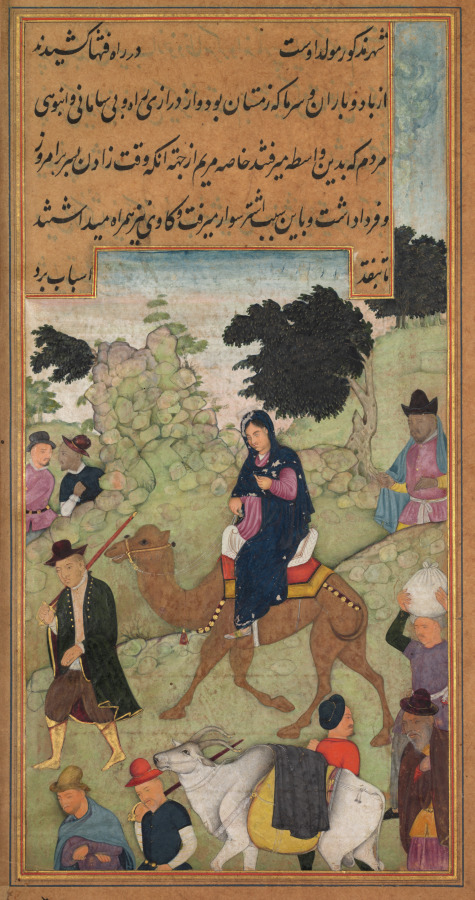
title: Mary and Joseph Travel to Bethlehem (folio 24 verso), from a Mirror of Holiness (Mir’at al-quds) of Father Jerome Xavier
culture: Mughal India, Allahabad, made for Prince Salim (1569–1627)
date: 1602–4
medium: Gum tempera, ink, and gold on paper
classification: Manuscript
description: Joseph leads the heavily pregnant Mary riding on a camel. In the text Father Jerome wrote that Mary rode a “pack beast,” so the Indian artist opted to portray her on a camel. An ox in the foreground carries their belongings, and the bent trees indicate the journey’s harsh conditions. They are on the way to Bethlehem, the city of King David, from whom Joseph was descended, in order to register for a census. Father Jerome often emphasized the royal lineage of Jesus, apparently in an effort to impress the Mughals.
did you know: Wearing a green coat, Joseph carries a sword over his shoulder, suggesting that he is ready to face any potential trouble.